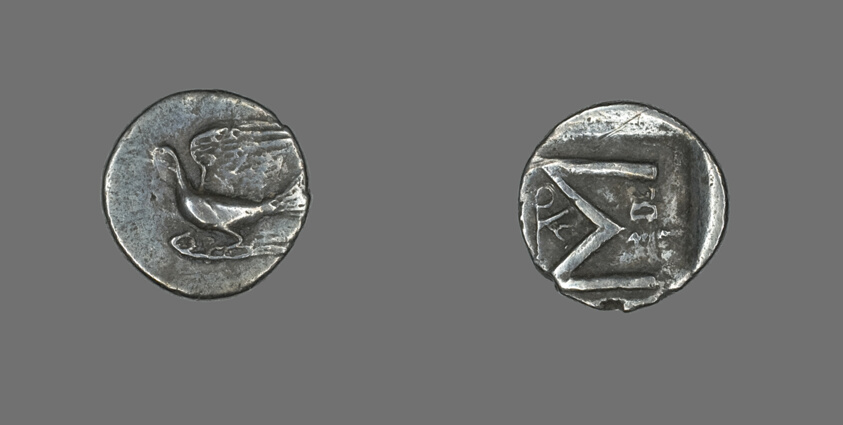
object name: Coin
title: Hemidrachm (Coin) Depicting a Dove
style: greek, ancient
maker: Greek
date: 251-146 BCE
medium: Silver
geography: Ancient Greece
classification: coin; ancient art